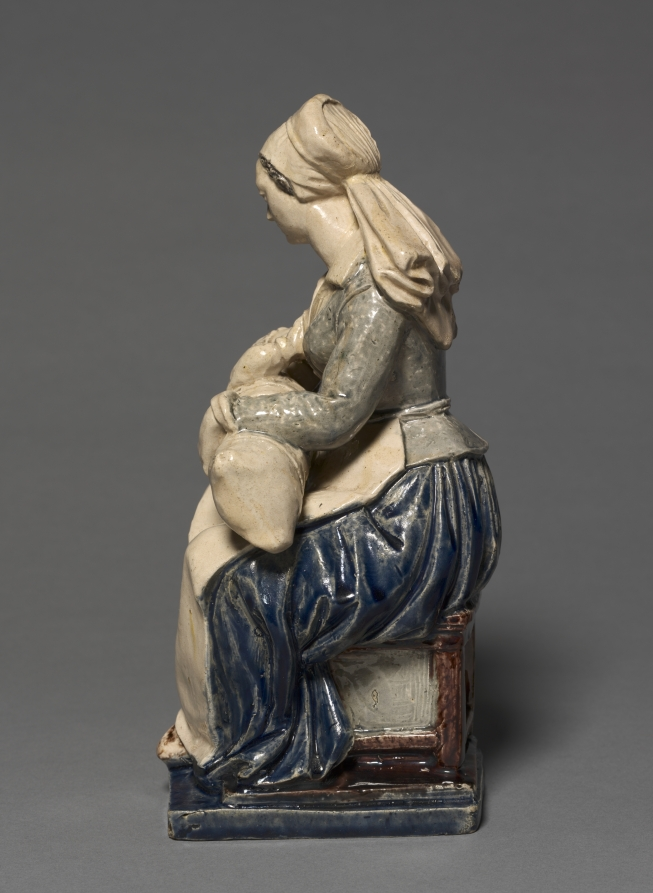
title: Figure of the Nurse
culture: France, 17th century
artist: attributed to Claude Bertélémy de Blénod (French)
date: early 1600s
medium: faience with enamel decoration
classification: Ceramic